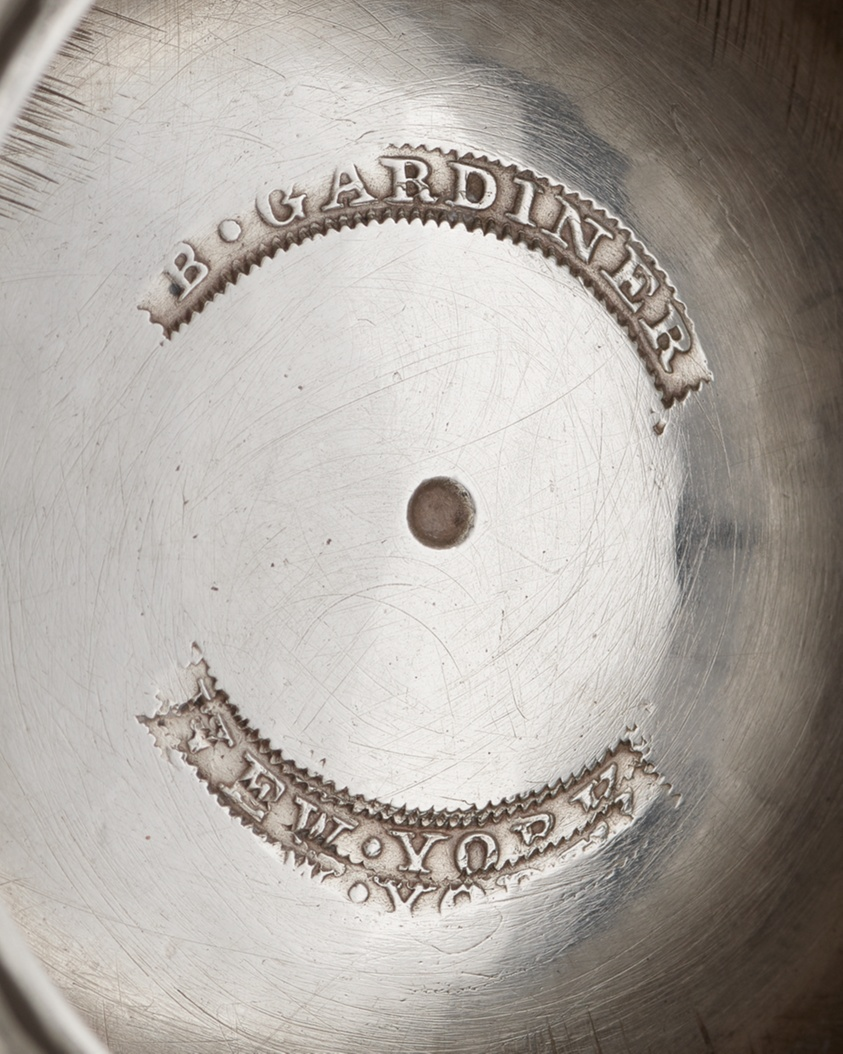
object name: Metalwork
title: Pitcher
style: 19th century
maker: Retailed by Baldwin Gardiner (American, 1791–1869); New York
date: 1827–48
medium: Silver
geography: New York City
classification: pitcher (vessel); silver; decorative arts